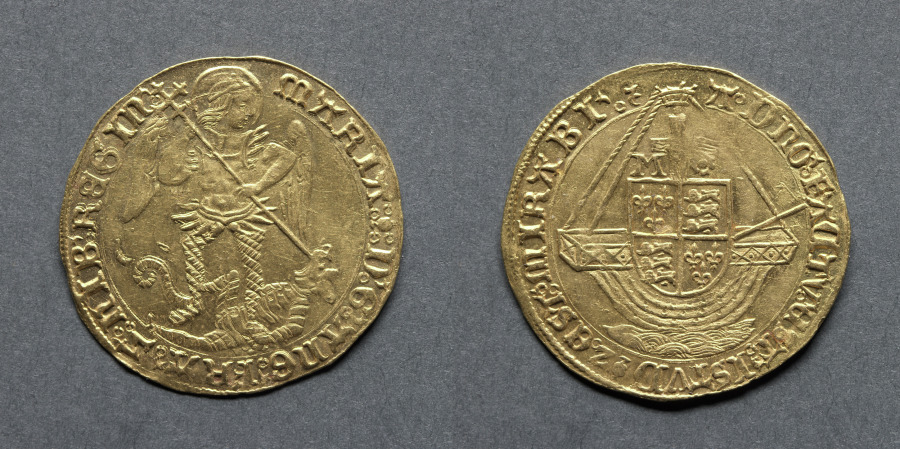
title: Angel: An Angel Slaying a Dragon (obverse); Ship with Shield of Arms (reverse)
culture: England, Mary, 1553-1554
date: 1553–54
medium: gold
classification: Coins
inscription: MARIA D G ANG FRA Z HIB REGIN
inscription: A DNO FACTV EST ISTVD Z EST MIRABI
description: This piece is one of the finest specimens known. It contains on the reverse, at the end of the legend, an unexplained mark that strongly resembles a small letter c, superimposed on a figure 7.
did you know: The angel was an English gold coin introduced by Edward IV in 1465.